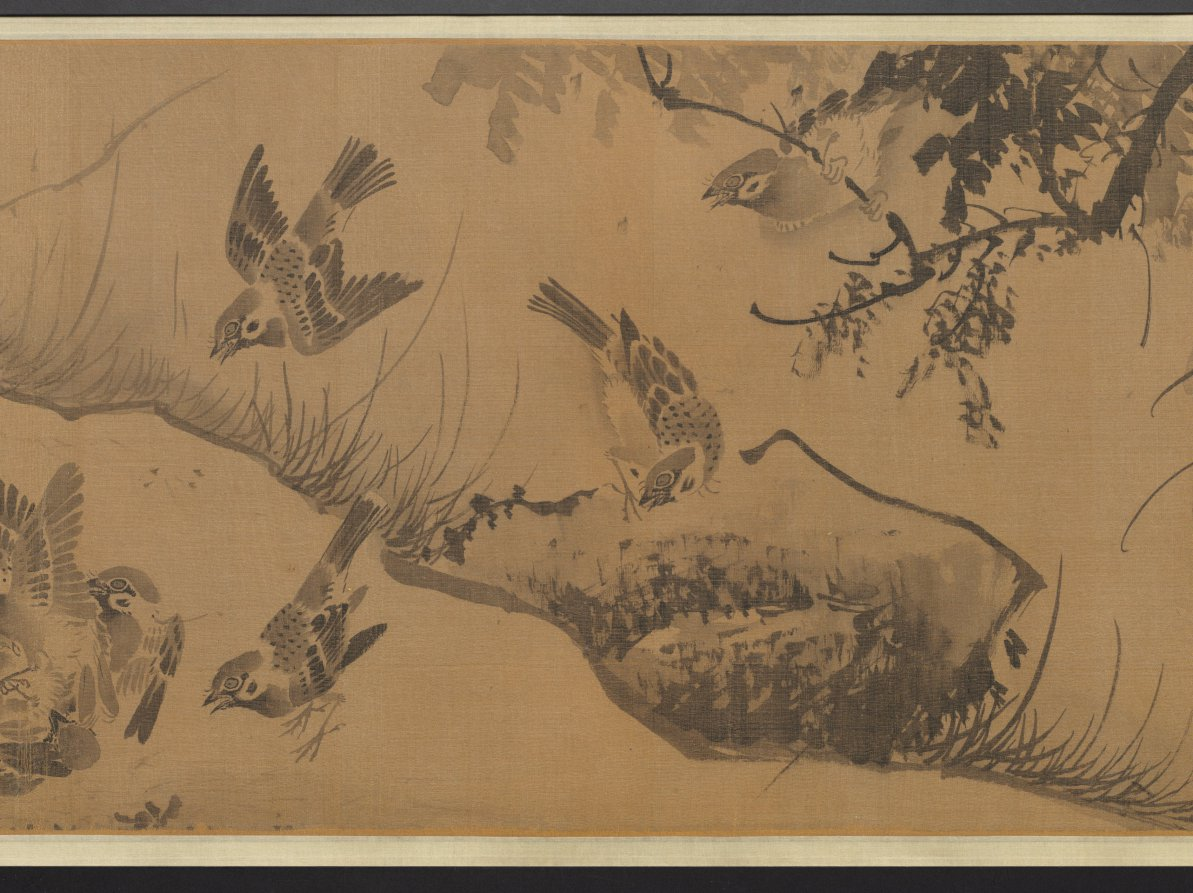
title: A Hundred Sparrows in a Lofty Grove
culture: China, Ming dynasty (1368–1644)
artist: attributed to Lin Liang (Chinese, 1416–1480)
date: 1368–1644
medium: handscroll; ink on silk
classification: Painting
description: Sparrows engaged in all kinds of activities frolic amid leafy branches, blades of grass, rocks, and a waterfall. As our eyes move over the scroll, the artist engages us in enjoying the sparrows’ carefree movements in a natural setting. The charming birds were painted from close observation in swift and fluent brushstrokes. Sparrows are a common bird and in Chinese painting they often represent the commoner in human society as opposed to the noble pheasant or peacock representative of the ruling class.